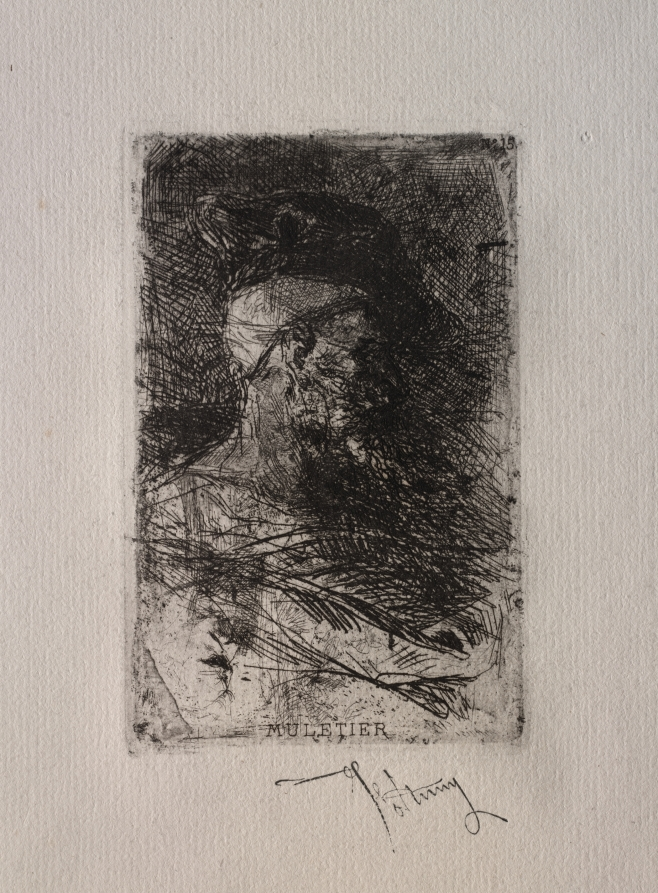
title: Mule Driver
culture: Spain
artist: Mariano Fortuny (Spanish, 1838–1874)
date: 1868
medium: etching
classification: Print